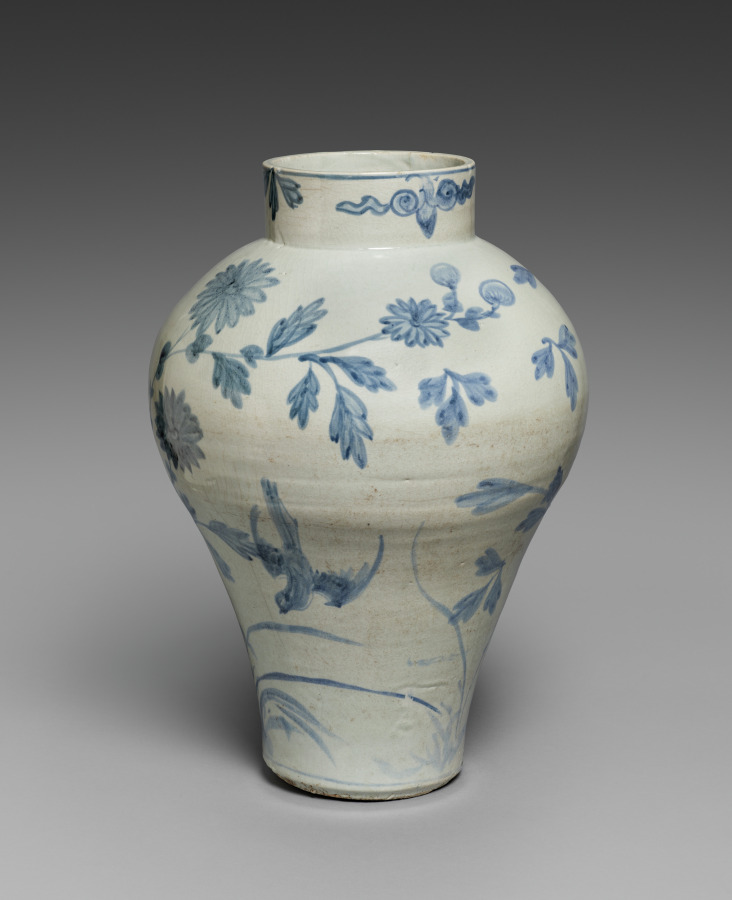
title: Vase with Bird and Flower Design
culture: Korea, Joseon dynasty (1392–1910)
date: late 1800s–early 1900s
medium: porcelain with underglaze blue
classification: Ceramic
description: This vase with broad shoulders and a tall neck represents a typical style of 19th-century blue-and-white porcelain. Unlike earlier examples decorated mainly with literati themes that evoke neo-Confucian moral values—plum blossoms (purity), orchids (grace), bamboo (integrity), and chrysanthemums (loftiness)—porcelain works of the 1800s feature fully bloomed peonies and a pair of playful birds, symbols of wealth and familial harmony.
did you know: Nineteenth-century Korean blue-and-white porcelains tend to feature broad shoulders and a tall neck.